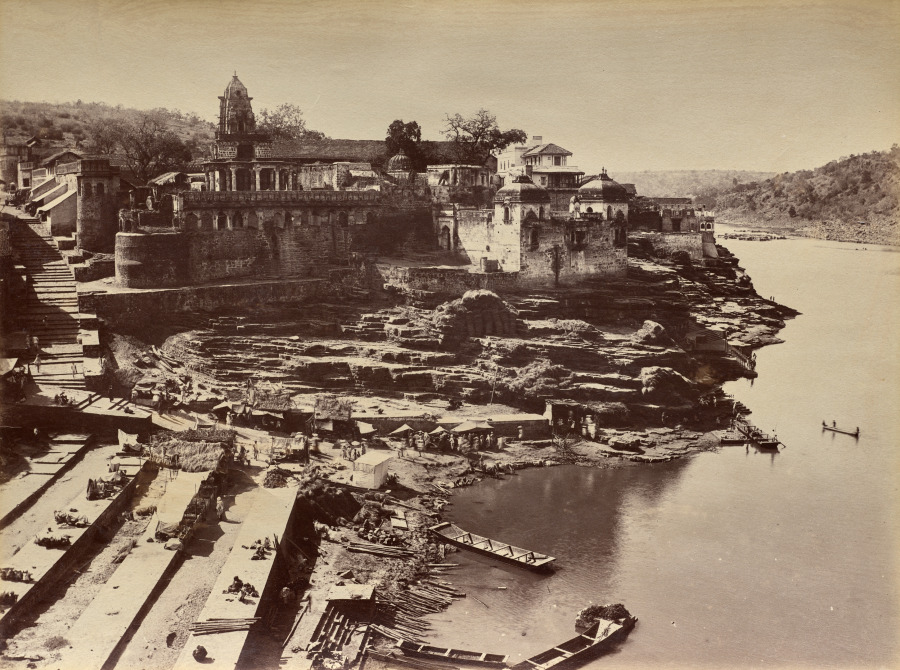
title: View of the Riverbank of the Narmada at Omkareshwar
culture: India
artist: Raja Deen Dayal (Indian, 1844–1905)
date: 1882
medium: albumen print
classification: Photograph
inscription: Graphite inscription on verso: "1624"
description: Bridges now span the river, which is dammed to the east to provide hydroelectric power. When this photograph was made, the river was an important site of trade and transportation, and the riverbank a major locale for commerce and commuting.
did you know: The Omkareshwar shrine, located on an island in the sacred Narmada River, was accessible in the 1800s only by boat.